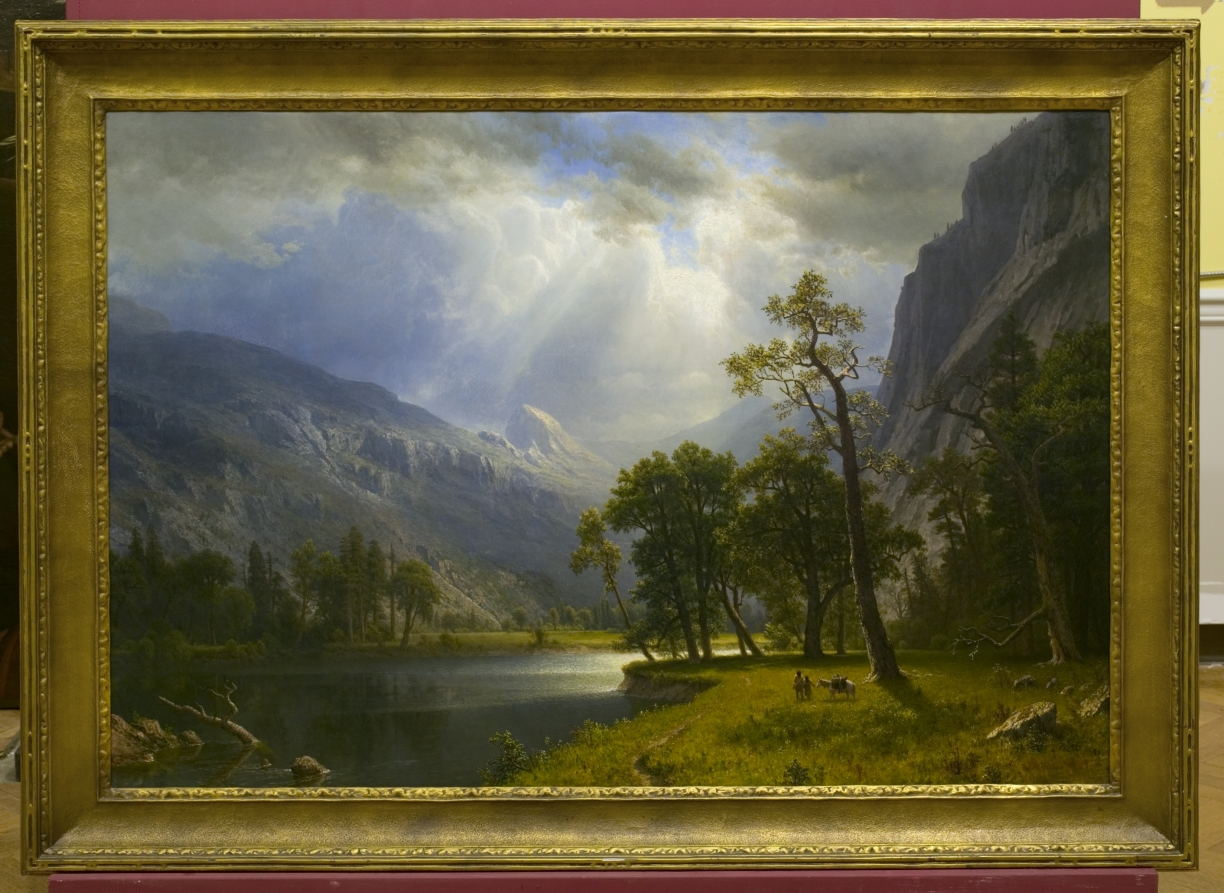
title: Mount Starr King, Yosemite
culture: America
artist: Albert Bierstadt (American, born Prussia [now Germany], 1830–1902)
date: 1866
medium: oil on canvas on panel-back stretcher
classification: Painting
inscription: signed lower right: ABierstadt. / 66 [AB in monogram]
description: During the summer of 1863, Bierstadt visited Yosemite Valley in California and made numerous sketches. Back in his New York studio, he used them to produce many majestic paintings, including this view of the distant granite peak Mount Starr King. Such scenes thrilled East Coast audiences and helped encourage early movements to safeguard natural wonders. In 1864, President Lincoln signed a bill preserving Yosemite as public property; it became a national park in 1890. Bierstadt included two Native Americans with a packhorse in his composition, and their presence references the fact that Indigenous peoples had inhabited or seasonally visited the region for millennia. Over time, various government and military agencies dispossessed them of these ancestral lands. Although no longer residents in the national park, descendants of the seven Indigenous nations with ties to Yosemite persevered to live in neighboring areas.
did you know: Highly successful, Bierstadt built a mansion and named it Malkasten, a German word meaning “paintbox.”